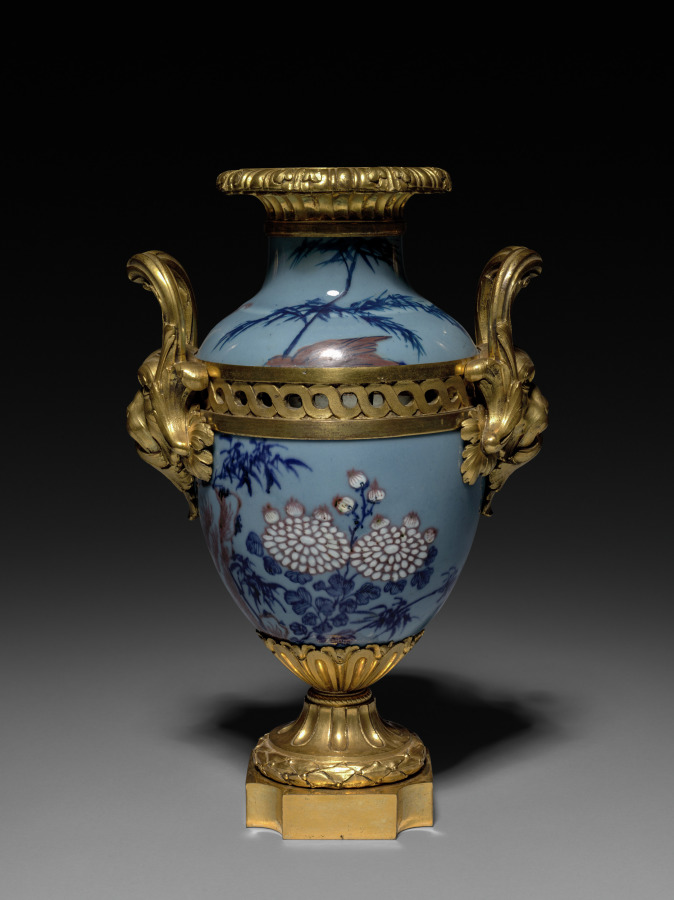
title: Vase for a Garniture Set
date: 1736–1770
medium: Chinese hard-paste porcelain, gilt bronze, enameled metal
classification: Furniture and woodwork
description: The fascination with Chinese porcelain among aristocratic circles increased during the reign of Louis XV. In reaction to the perceived excesses of elaborate naturalistic ornament of the 1750s, mount makers increasingly turned to neoclassical designs, known as Goût Grec (Greek taste) in the 1760s and 1770s. These beautifully chased gilt-bronze mounts feature classical Greco-Roman motifs such as lion masks, acanthus and laurel leaves, and pilasters.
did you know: A set of vases and clock, connected visually by the use of the same materials, often adorned a mantlepiece or the top of a large piece of furniture, such as a commode or console, within a room.